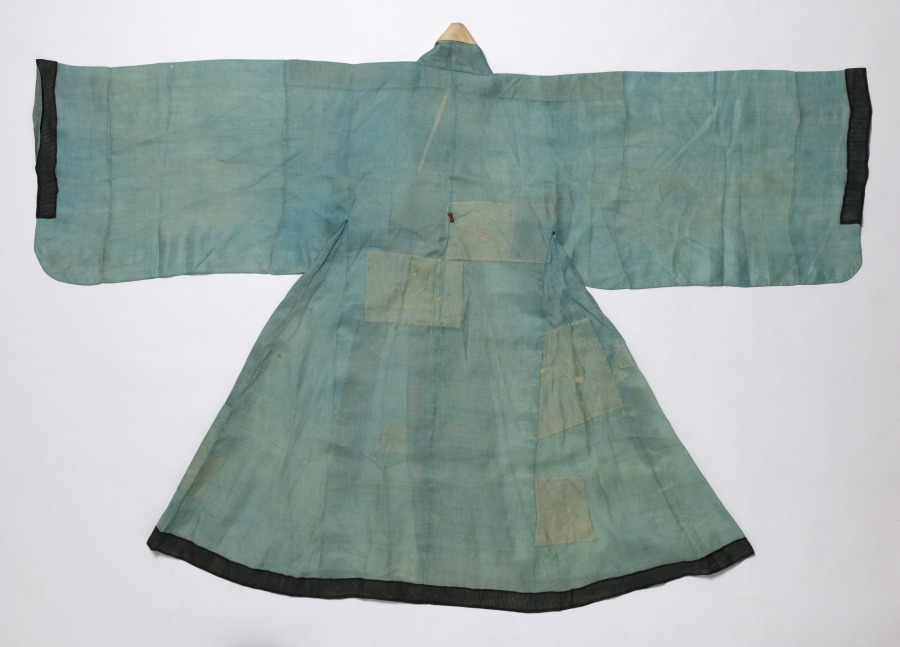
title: Inner Coat for the Royal Ceremonial Costume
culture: Korea, Joseon dynasty (1392–1910)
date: late 1800s–early 1900s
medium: silk: dyed blue, black, and white; gauze weave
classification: Garment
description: This is a set of royal ceremonial robe and accessories worn by a high-ranking court official for attending special state ceremonies. The set consists of an inner coat, an outer coat, a skirt, a back apron, a crown, a pair of jade tassels, a tablet, and a belt.